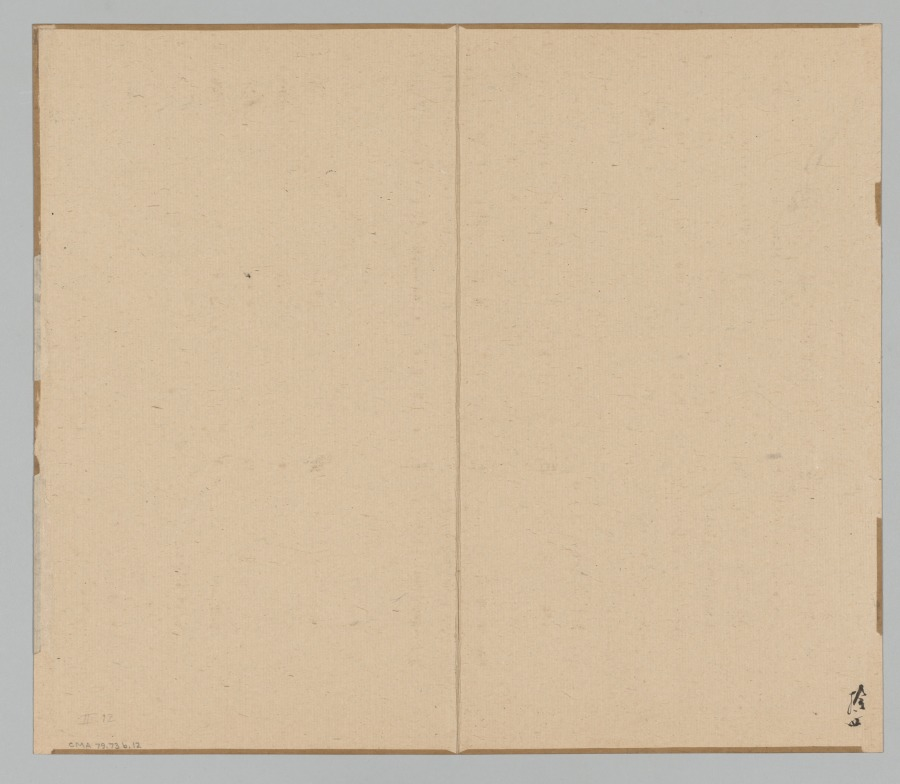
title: Reverberations of Taiga, Volume 2 (leaf 12)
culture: Japan, Edo period (1615–1868)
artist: Aoki Shukuya (Japanese, d. 1802)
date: mid- to late 1700s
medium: double-leaf from a pair of albums; ink and light color on paper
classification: Portfolio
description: Traditionally, young painters in Japan began their studies with an established master-painter. The master's compositions invariably became models that the apprentice copied to learn various ink and brush techniques. Shukuya was a pupil of the famous Kyoto artist Ikeno Taiga, whose style is reflected in these sketches of rocks, trees, and mountains.